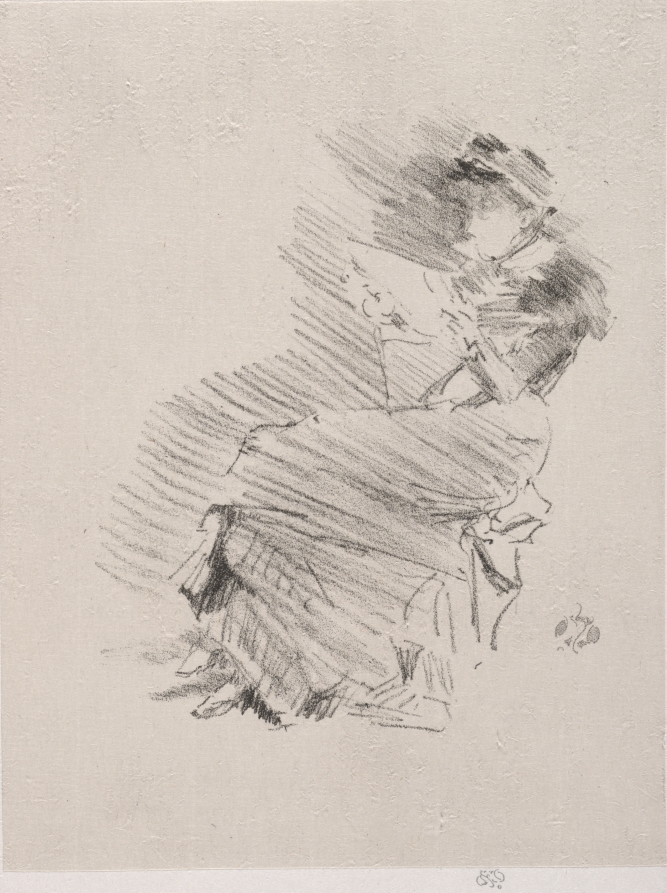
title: Reading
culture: America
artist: James McNeill Whistler (American, 1834–1903)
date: 1879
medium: lithograph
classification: Print